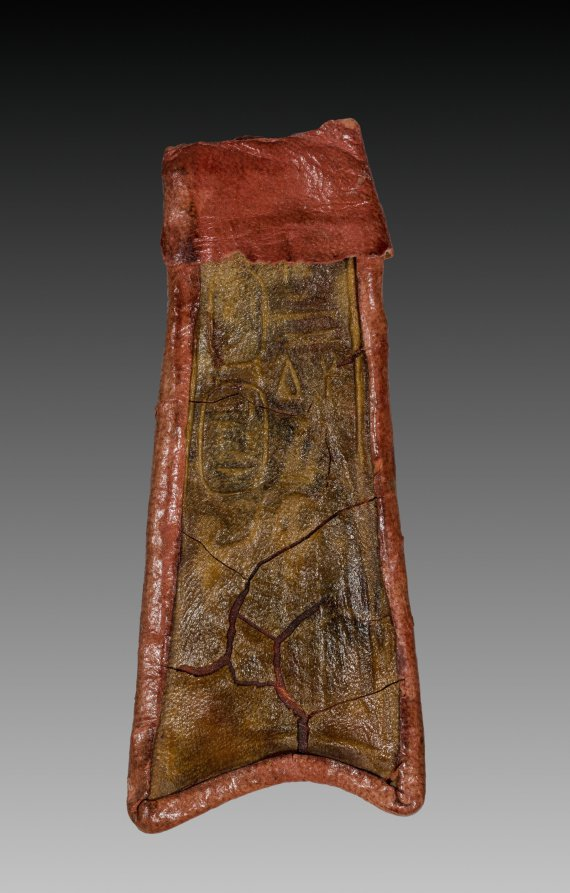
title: Tab from Mummy Band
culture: Egypt, Third Intermediate (1069–715 BCE), Dynasty 22, reign of Osorkon I (992–887 BCE)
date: 945–715 BCE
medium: stained leather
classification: Funerary Equipment